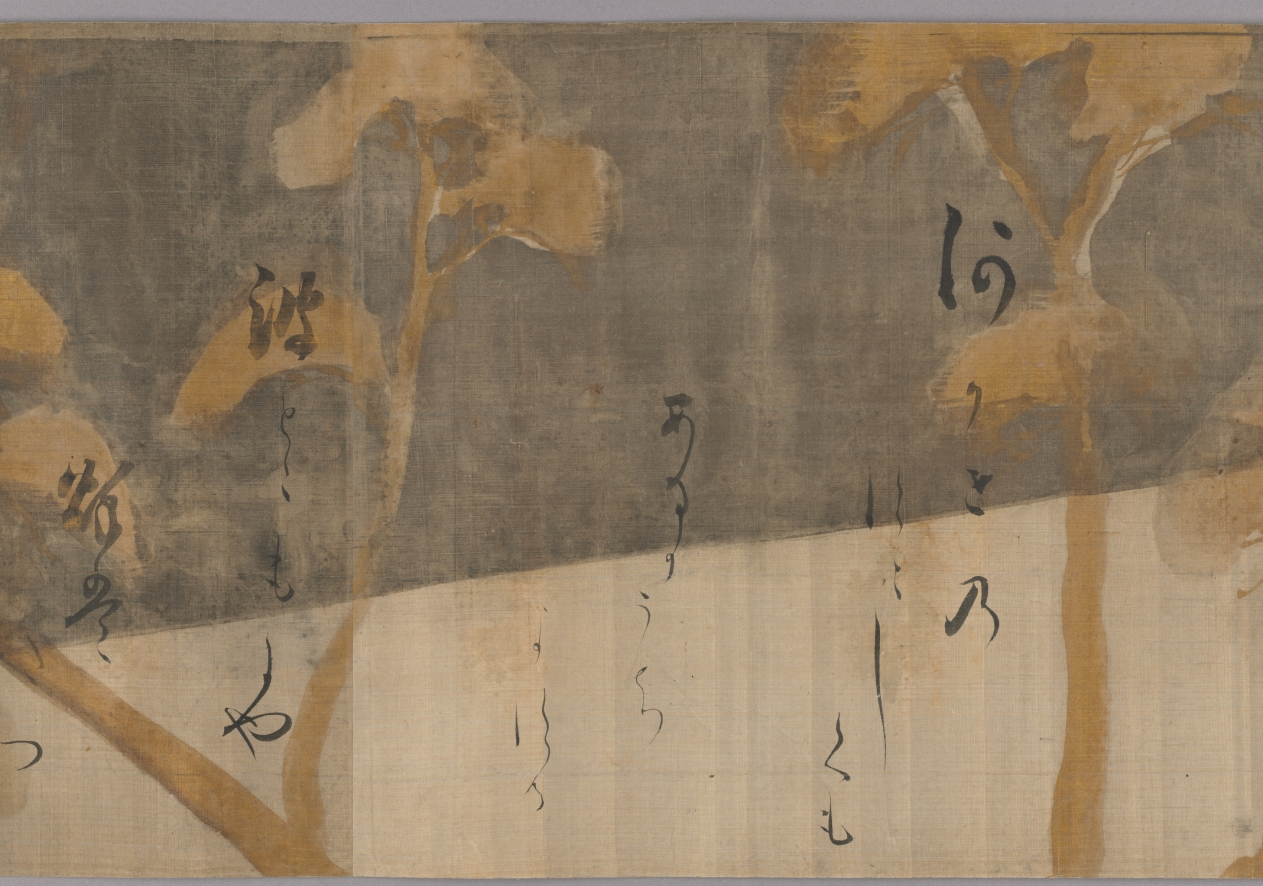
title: Selections from the Collection of Japanese Poems from Ancient and Modern Times (Kokin wakashū) with Design of Pines Along the Shore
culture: Japan, Momoyama period (1573-1615) to Edo period (1615-1858)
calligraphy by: Hon'ami Kōetsu (Japanese, 1558–1637)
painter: attributed to Tawaraya Sōtatsu (Japanese, c. 1570–c. 1640)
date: 1600s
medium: handscroll; ink on silk with gold and silver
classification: Calligraphy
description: The calligrapher and craftsman Hon’ami Kōetsu frequently collaborated with Tawaraya Sōtatsu, a painter who ran a studio that produced fans and screens. Sōtatsu’s work featured abstracted and flattened shapes, fields of color and gold, and asymmetry. In particular, motifs that appeared in small scale, such as flora and fauna, in early decorated Japanese papers were painted in a larger scale—blown up as if seen under a magnifying glass. For this handscroll, Kōetsu brushed poems from the autumn section of a poetry anthology onto silk with a landscape of pines in gold and silver likely painted by Sōtatsu.